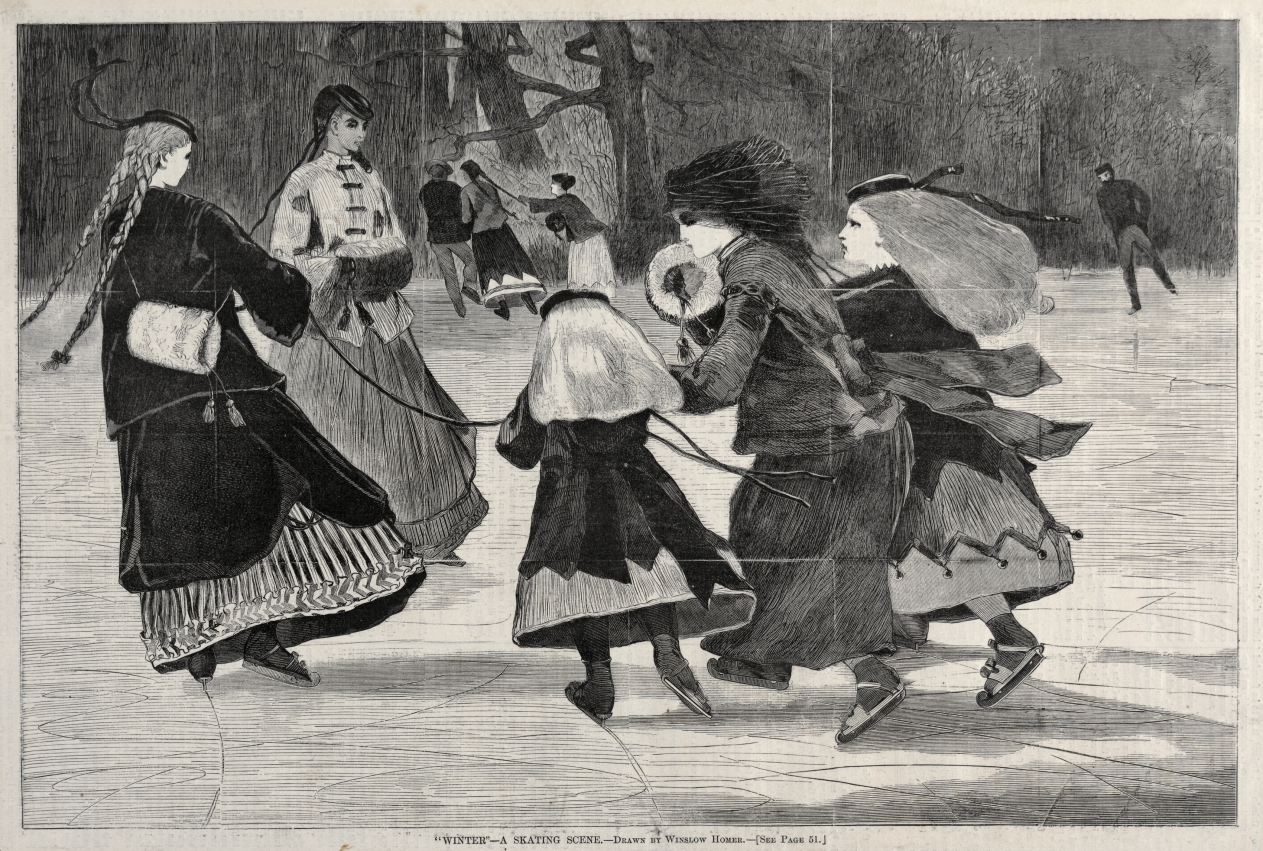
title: "Winter" - A Skating Scene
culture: America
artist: Winslow Homer (American, 1836–1910)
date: 1868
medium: wood engraving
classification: Print